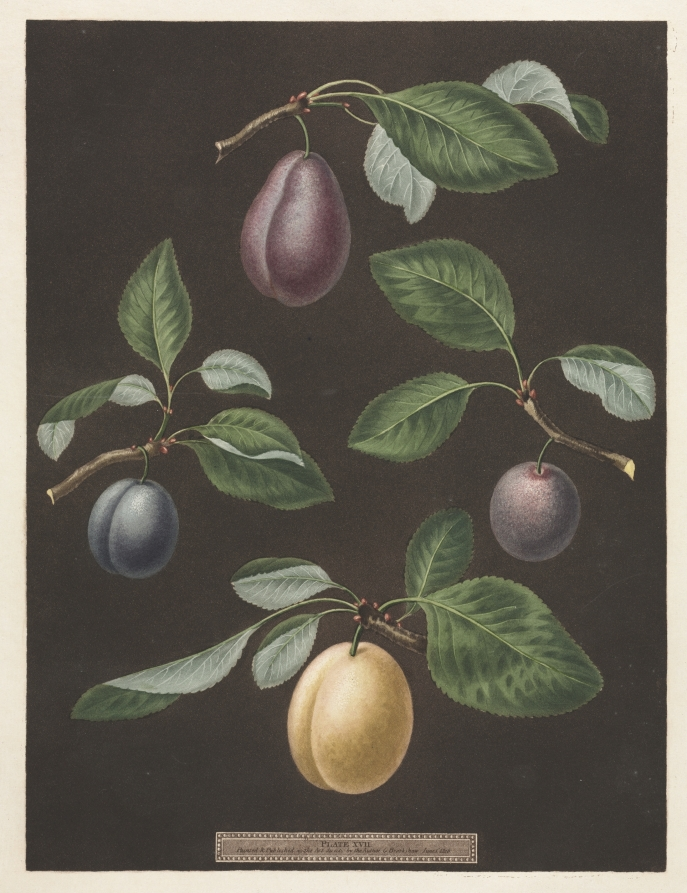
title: Pomona Britannica: No. 17 - Plums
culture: England, 19th century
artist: George Brookshaw (British, 1751–1823)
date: 1806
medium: aquatint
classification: Print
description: Pomona Britannica illustrates fruits cultivated at Hampton Court Palace’s gardens, the most celebrated around London. It was devoted to the most handsome varieties of fruit cultivated in England. Most of the 90 plates in this large and sumptuous book, like these, have dark aquatint backgrounds.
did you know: Before publishing his botanical illustrations, Brookshaw was a renowned maker of painted furniture.